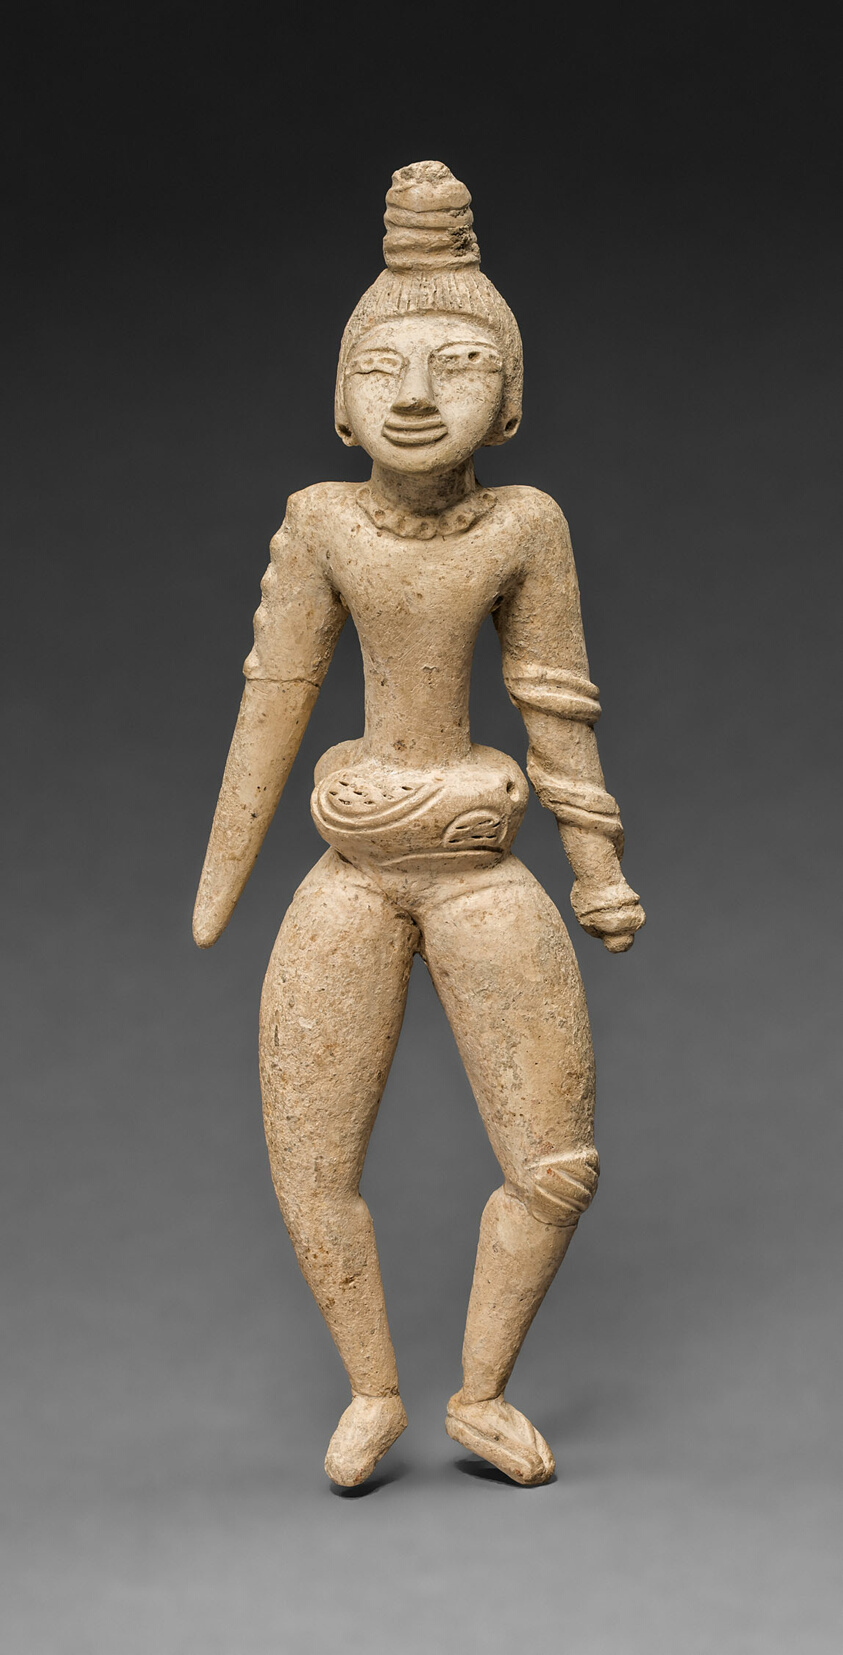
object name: Sculpture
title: Ballplayer Figurine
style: huastec, classic veracruz, americas, mesoamerican, Arts of the Americas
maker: Huaxtec; Pánuco River Valley, northern Veracruz, Mexico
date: 800–1400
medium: Ceramic and pigment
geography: Veracruz state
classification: earthenware; art of the americas; ceramics; sculpture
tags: people, ballgame